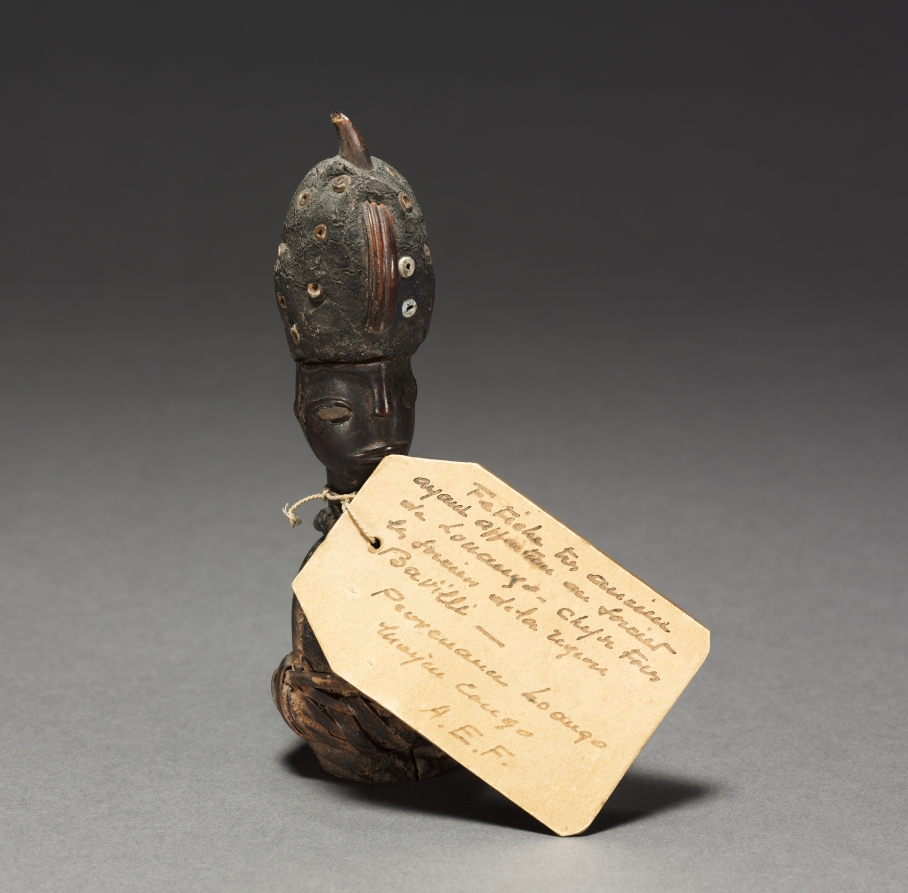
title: Power figure (nkisi)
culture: Central Africa, Republic of the Congo, Kongo people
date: late 1800s-early 1900s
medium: Wood, organic materials (including resin), iron, reed, tooth, seashell or glass beads, and possibly plastic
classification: Sculpture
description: One of seven anthropomorphic figurines, these minkisi contained medicines in which an ancestral spirit was believed to reside. Minkisi were objects of communal use; if conflict arose between two citizens, the Nkisi figure, along with the nganga (ritual leader) helped resolve the dispute. This small figure belonged to “the sorcerer of Loango,” chief of all sorcerers of that region (a province and port in West Central Africa).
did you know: This small figure belonged to “the sorcerer of Loango,” chief of all sorcerers of that region (a province and port in West Central Africa).